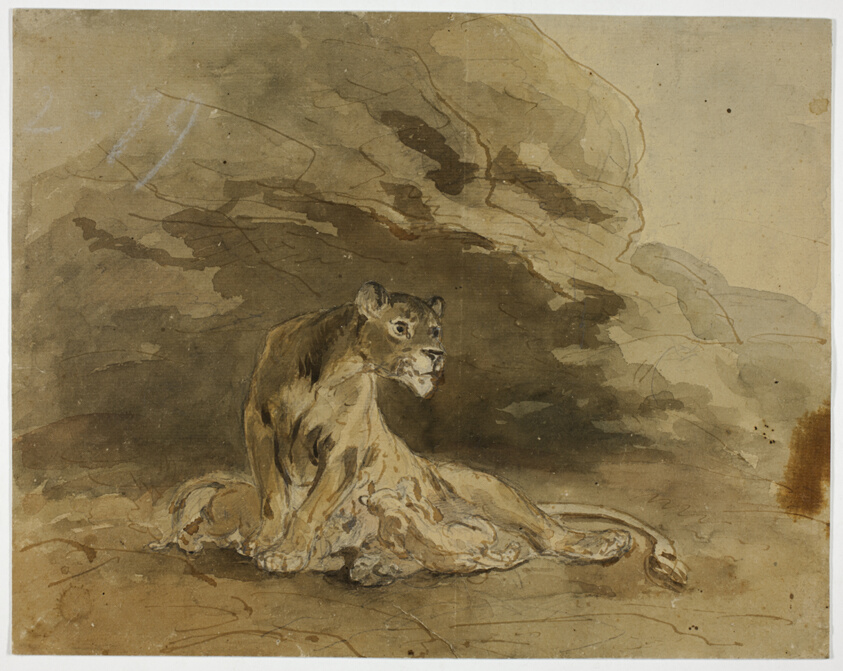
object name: Drawing and Watercolor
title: Lioness and Cubs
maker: Possibly Sawrey Gilpin (English, 1733-1807); or after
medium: Brush and gray and brown wash, over graphite, on cream laid paper, laid down on tan laid paper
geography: England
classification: ink or chalk wash; paper; brush and wash; drawings (visual works); prints and drawing